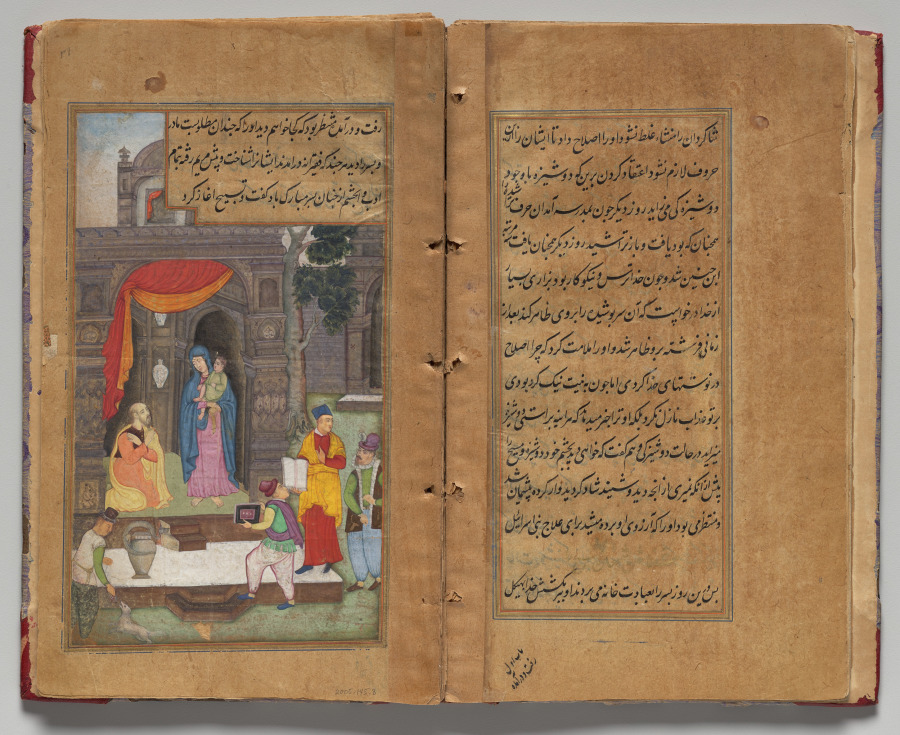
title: Mirror of Holiness (Mir’at al-quds) of Father Jerome Xavier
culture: Mughal India, Allahabad, made for Prince Salim (1569–1627)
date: 1602–4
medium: 24 full size illustrations with 160 folios of text; gum tempera, ink, and gold on paper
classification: Manuscript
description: Father Jerome Xavier (1549–1617) of the Society of Jesus, also known as the Jesuit order of Catholic priests, spent 19 years as a guest at the Mughal court from 1595 until 1614. While in residence he learned the Persian language so that he could engage in theological discussions in the courts of Akbar and his successor, Jahangir. When Akbar requested a biography of Jesus, Father Jerome wrote the Mir’at al-quds in Persian prose. This text relates his version of the life and miracles of Jesus based on a number of canonical and apocryphal sources. He emphasized aspects of the life of Jesus that he thought would appeal to Akbar in the hopes of winning the emperor’s conversion to Christianity.